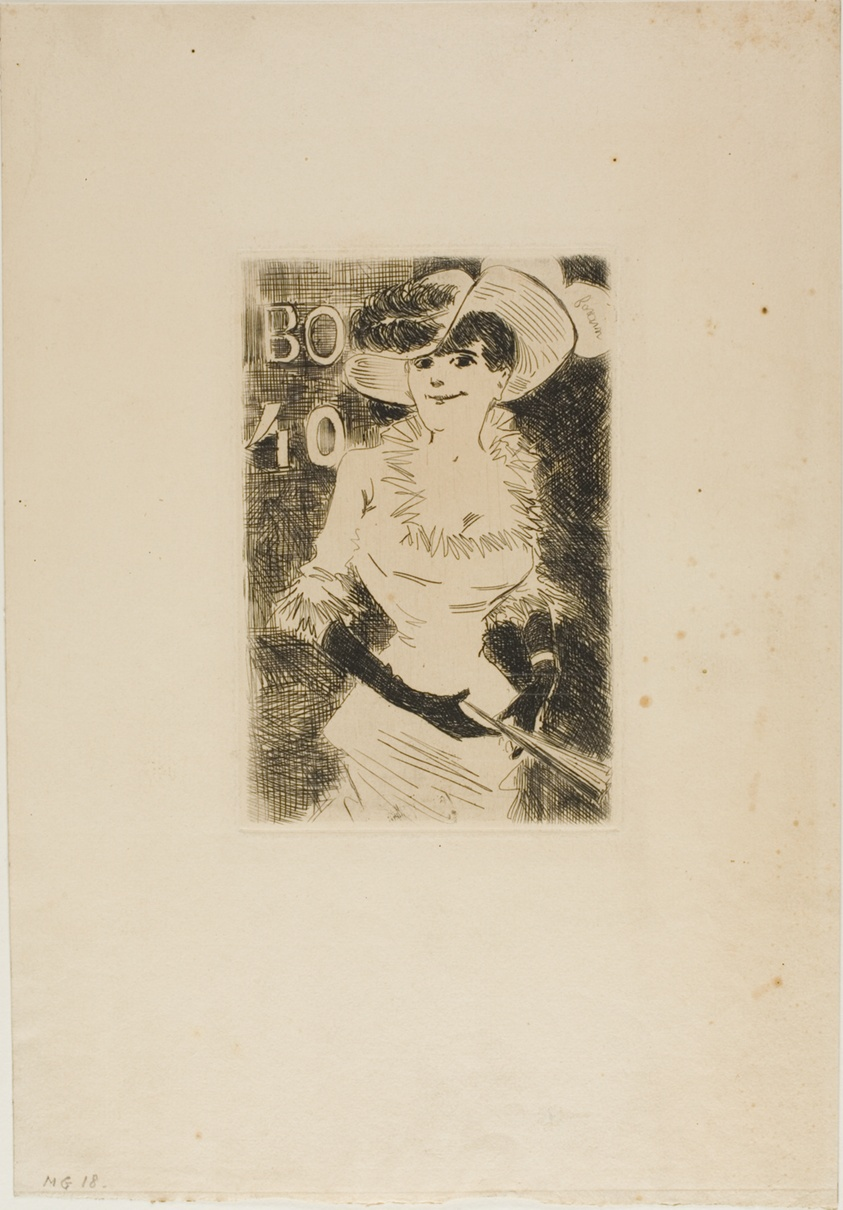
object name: Print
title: The Walker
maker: Jean Louis Forain (French, 1852-1931)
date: 1880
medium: Etching on cream laid paper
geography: France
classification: etching; print; prints and drawing